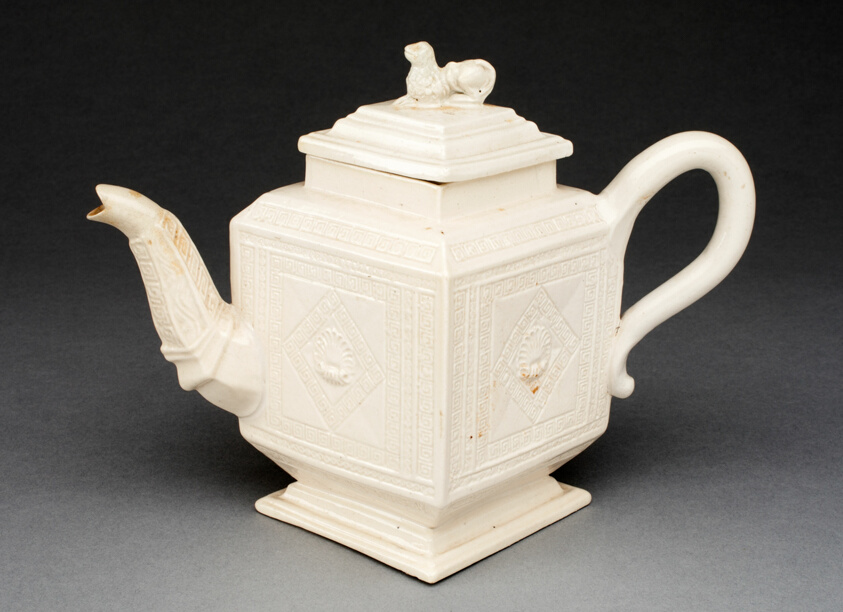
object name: Ceramics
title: Teapot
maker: Staffordshire, England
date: c. 1750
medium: Salt-glazed stoneware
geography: Staffordshire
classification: teapot; european decorative arts; salt-glazed stoneware; stoneware; ceramics